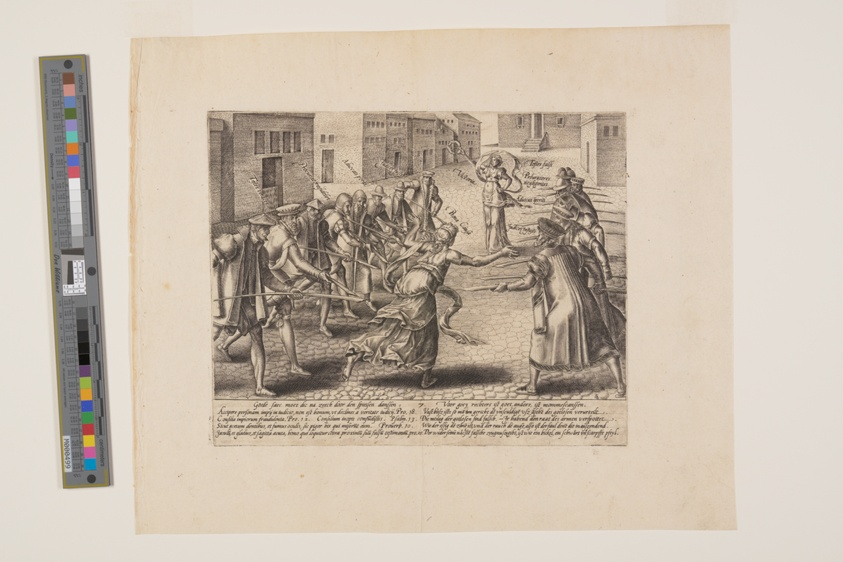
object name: Print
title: Imperiled Litigation, from Litis Abusus (The Abuses of the Law)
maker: Hendrick Goltzius (Dutch, 1558–1617)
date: c. 1576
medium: Engraving on ivory laid paper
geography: Netherlands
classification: print; paper; prints and drawing; engraving